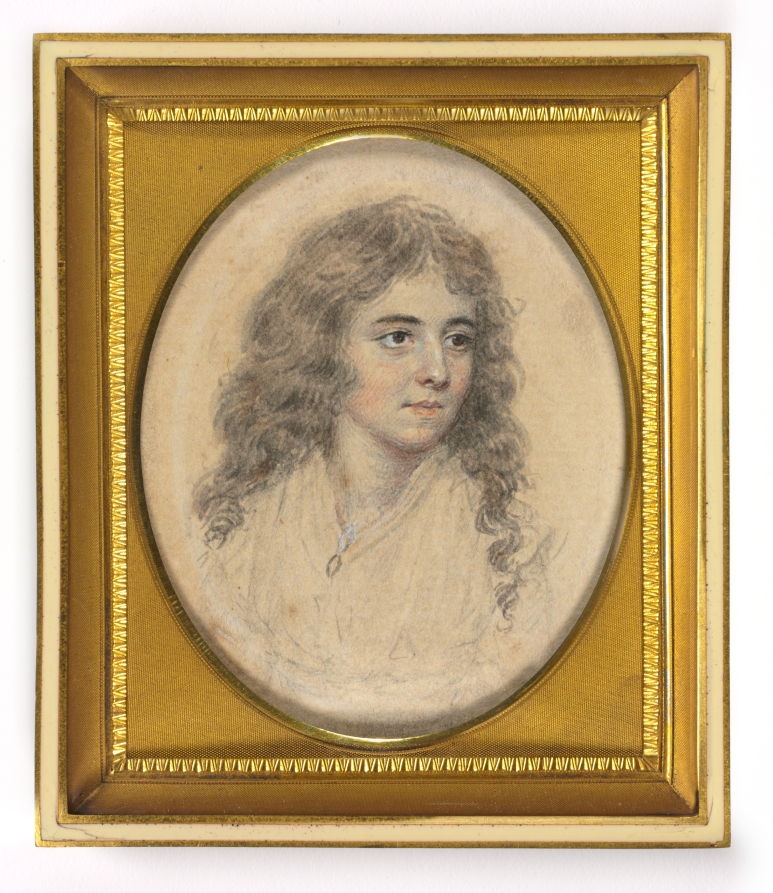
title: Portrait of Anna Maria Woolf, née Smart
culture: England, 18th century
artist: John I Smart (British, 1741–1811)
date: c. 1785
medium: graphite and wash on laid paper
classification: Portrait Miniature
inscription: Signature: none; inscribed on front of paper at upper right corner: 1[?][?]; inscribed on paper backing, in graphite at left center: Indi; upside down, at left above center: 38; inscribed in brown ink at center, on back of drawing: Mrs Peirce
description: Although it is impossible to say whether or not it was always part of the artist’s process to execute a preparatory sketch prior to painting each miniature, we do know that John Smart retained many hundreds of these sketches. A group of preparatory sketches—of which this portrait is one—descended through the Smirke family after Smart’s daughter Sarah gave a sketchbook containing preparatory portrait studies to her friend Mary Smirke, sister of the celebrated Victorian architect Sydney Smirke. This book was probably broken up around 1877 when it was divided between Sydney’s daughters Mary Jemmett and Mrs. Lange, whose portions were both sold at auction in 1928. This portrait was assigned the historically colorful but fictitious title of “Duchess Christina” at some point after memory of its true identity had been lost. Giving illustrious titles to portraits of unknown sitters was a popular strategy adopted by dealers during the nineteenth and twentieth centuries, often applied to miniature portraits and, in particular, to Smart’s sketches of women. Here, the sitter’s head is turned slightly to her left. She has dark brown eyes, rosy cheeks, and long, wavy dark hair falling below her shoulders. She wears a white dress with long sleeves and a ruffled bodice, and a small lozenge-shaped pendant around her neck. She is placed inside a faintly suggested oval, and the background is unpainted. The paper backing—removed in 1993—was inscribed with “38” and “Indi,” which may suggest that the sketch was executed during Smart’s time in India. The inscription that was discovered on the back of the drawing after the paper backing was removed reads, “Mrs [or perhaps Miss] Peirce.” Although the inscription appears to be in the artist’s hand, and in the brown ink he used to annotate his preparatory sketches, its relationship to this portrait is unclear. The sitter is probably Anna Maria, Smart’s eldest daughter by his first wife, whose name is unknown. Anna Maria (1766–1813) traveled with her father to India in 1785, sailing from England on April 19 and arriving in Madras on September 6. If the work was executed in India at the time Anna Maria accompanied her father there, the sketch may be dated to around 1785, the year they moved to the subcontinent. Anna Maria would have been around 18 years old. The fact that this portrait is of an older girl who dons a plain, modest dress and wears her hair down suggests an intimacy not found in the type of portraits Smart commonly executed of women wearing fine gowns and elaborately dressed hair.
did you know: After living in India for many years, Anna Maria was en route to England when she was forced to disembark at St. Helena to give birth to her son.